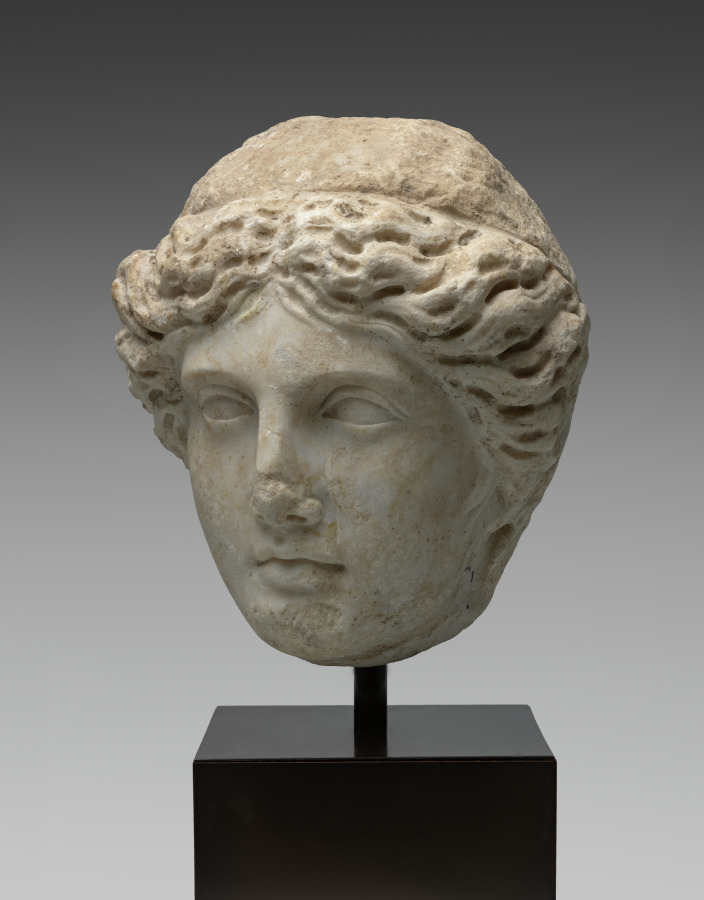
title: Head of Apollo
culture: Roman, Imperial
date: 1–200 CE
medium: marble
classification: Sculpture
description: This marble head, about three-quarter life-sized with idealized features, likely represents Apollo, the god most renowned for his youthful beauty. The hair spreads from a central part, flowing to either side in long and deeply drilled locks that cover the ears. An incised line separates these locks from a rougher area above, probably reserved for a separately made diadem or wreath, likely of metal.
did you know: This head of Apollo has also been identified as female, perhaps a Muse or other goddess.